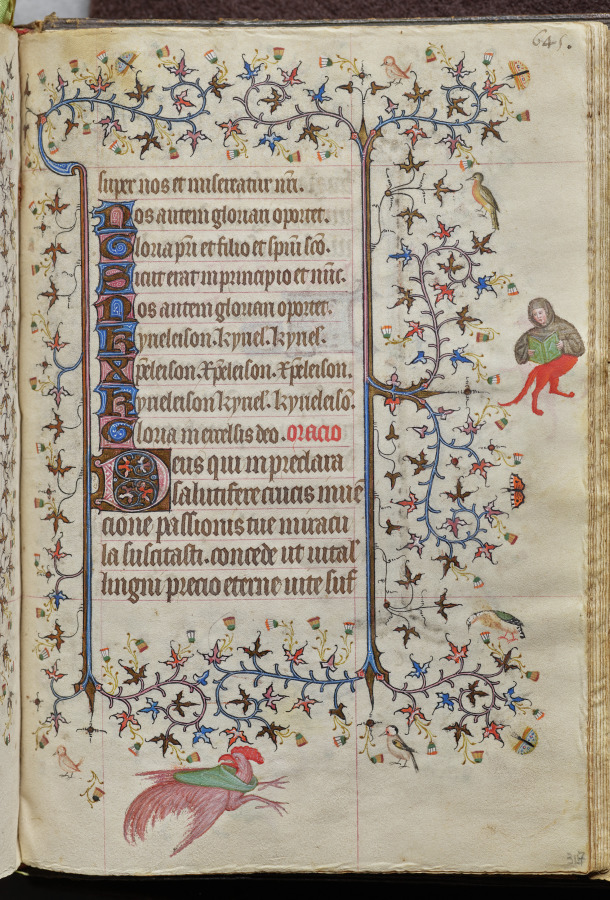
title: Hours of Charles the Noble, King of Navarre (1361-1425), fol. 317r, Text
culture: France, Paris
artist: Master of the Brussels Initials and Associates (French)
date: c. 1405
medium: ink, tempera, and gold on vellum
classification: Bound Volume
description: This precious volume was obviously highly prized by its owner, the French-born King of Navarre, who had his coat of arms painted on no less than twenty folios. Rather than directly commissioning this manuscript from a specific workshop, it seems that Charles the Noble acquired his book of hours -- perhaps ready-made for the luxury market -- while on a trip to Paris in 1404-05. A collaborative effort, six painting styles are evidenced within the pages of this codex, those of two Italians, two Frenchmen, and two Netherlanders. The painter who was responsible for the planning and decoration of the book, and who produced seventeen of the large miniatures, was a Bolognese artist known as the Master of the Brussels Initials. His principal assistant, responsible for most of the borders, was a Florentine who signed his name "Zecho" da Firenze on folio 208 verso.